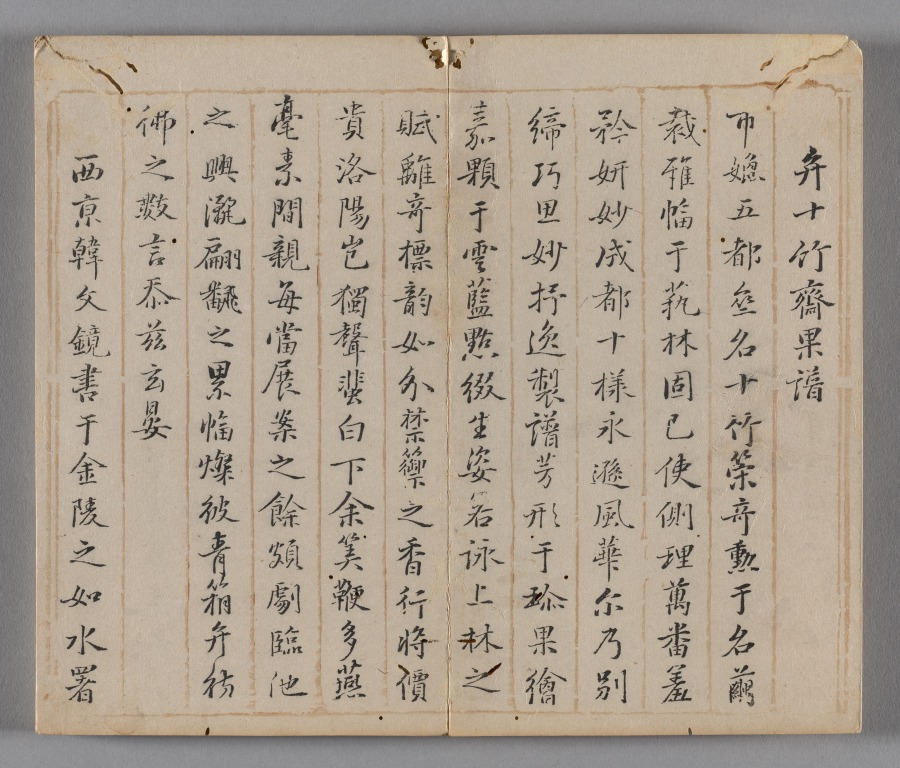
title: Ten Bamboo Studio Painting and Calligraphy Handbook (Shizhuzhai shuhua pu): Fruit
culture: China, Qing dynasty (1644-1911)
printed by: Hu Zhengyan (Chinese, c. 1584–1674)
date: 1633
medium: Woodblock-printed book; ink and colors on paper; first edition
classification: Print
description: Color printing reached a level of perfection in the early 1600s, as seen in this Ten Bamboo Studio Collection of Calligraphy and Painting and the Mustard Seed Garden Manual of Painting (printed 1679 and 1701). The painterly quality, precision in registering (aligning) the woodblocks, and harmonious colors made them the most successful color print editions in Chinese history. Both editions were printed and compiled in Nanjing, spread nationwide, and had a great impact on the arts in Japan and Korea.